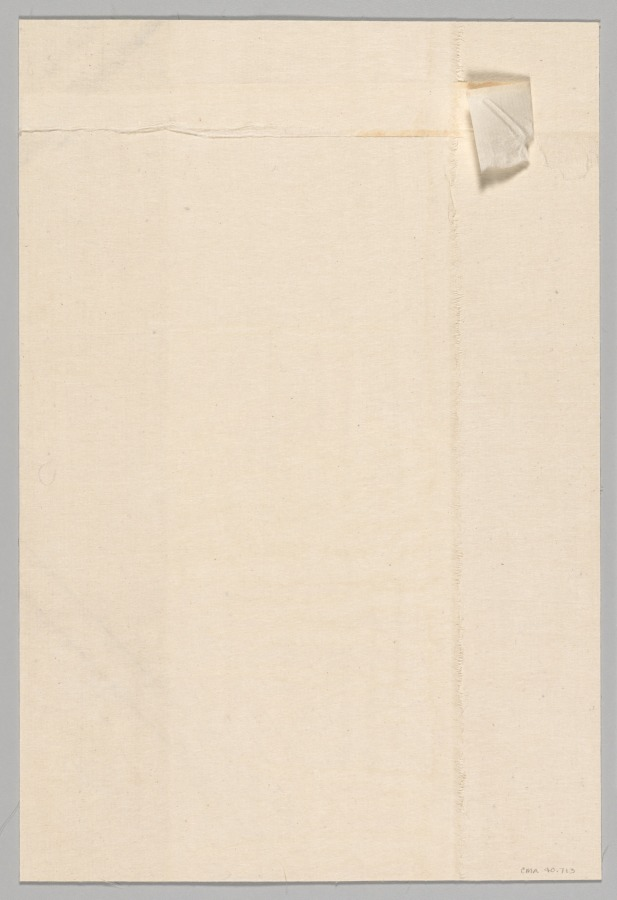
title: Seated Woman Washing Clothes in a Wooden Tub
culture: Japan, Edo period (1615–1868)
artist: Utagawa Kunisada (Japanese, 1786–1865)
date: 1786–1864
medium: color woodblock print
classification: Print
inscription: Signature: Gototei Kunisada